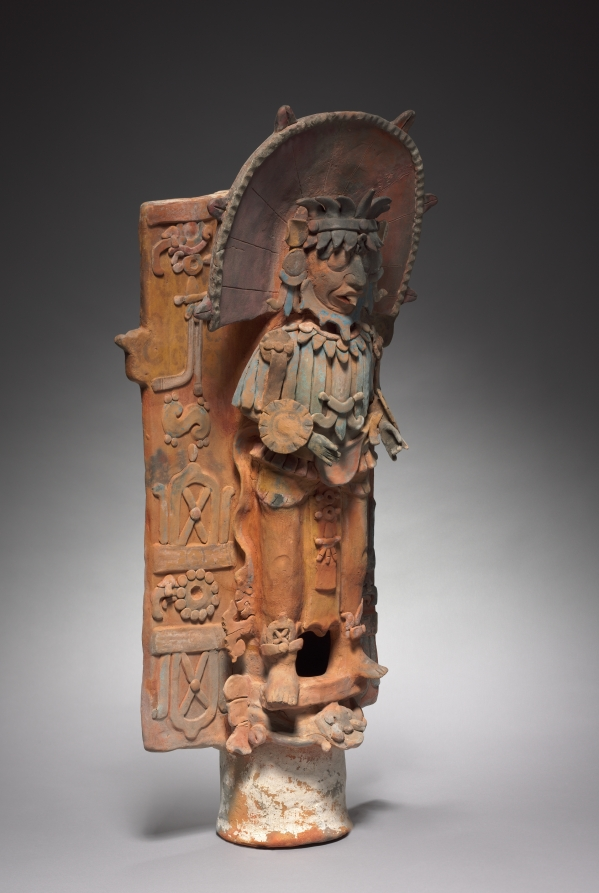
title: Incensario (Incense Burner) Support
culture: Mesoamerica, Maya, Palenque region, Classic Period (250-900) or modern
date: 600–900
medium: earthenware with pigments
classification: Sculpture